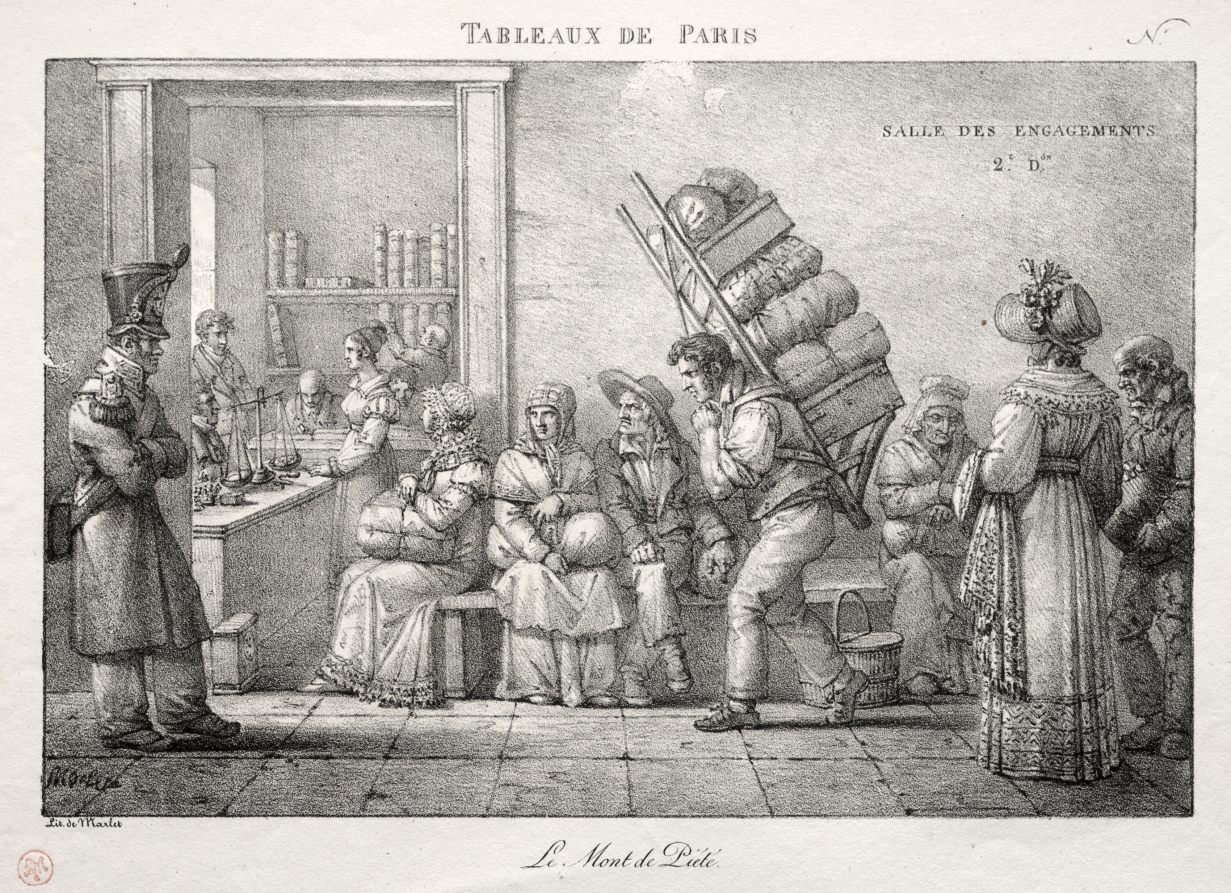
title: The Pawnshop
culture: France, 19th century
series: Scenes of Paris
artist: Jean Henri Marlet (French, 1770–1847)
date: 1820s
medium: lithograph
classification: Print